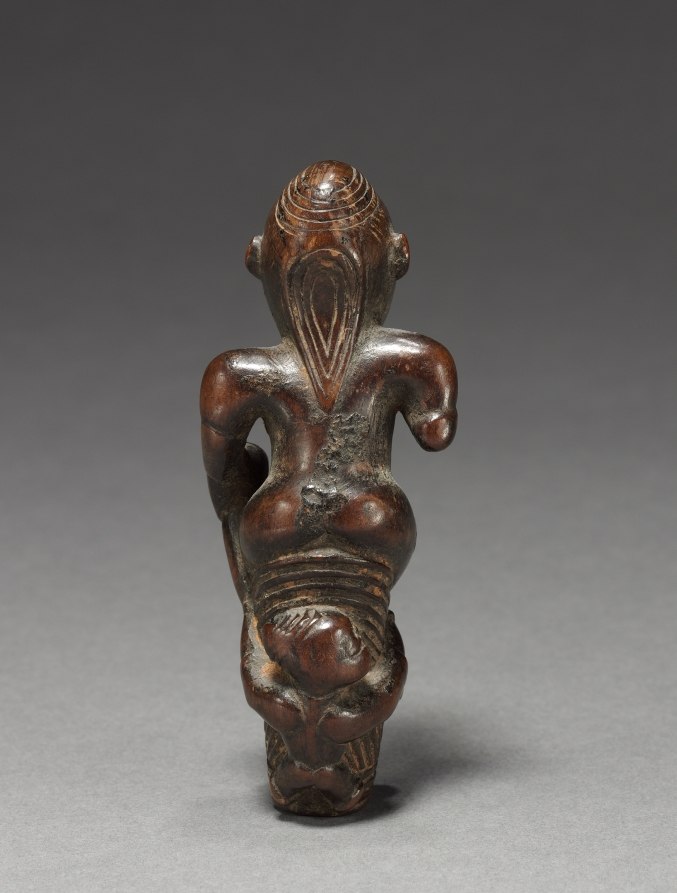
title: Male Figurine or Finial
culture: Central Africa, Democratic Republic of the Congo (most likely), Cabinda, or Republic of the Congo, probably Yombe people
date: early 1800s-early 1900s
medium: Wood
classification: Sculpture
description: This figurine or finial may have contained a medicine-filled package on its abdomen. The man seated with his legs crossed and wearing a coiffure of Portuguese inspiration may represent a chief, which was once attached to a scepter or perhaps a flywhisk. Beneath the chief, a child holds onto his back; though such imagery is more typically seen with female sculptures.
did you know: The stomach cavity was once filled with medicinal substances; once removed, the nkisi figure is considered “decommissioned.”